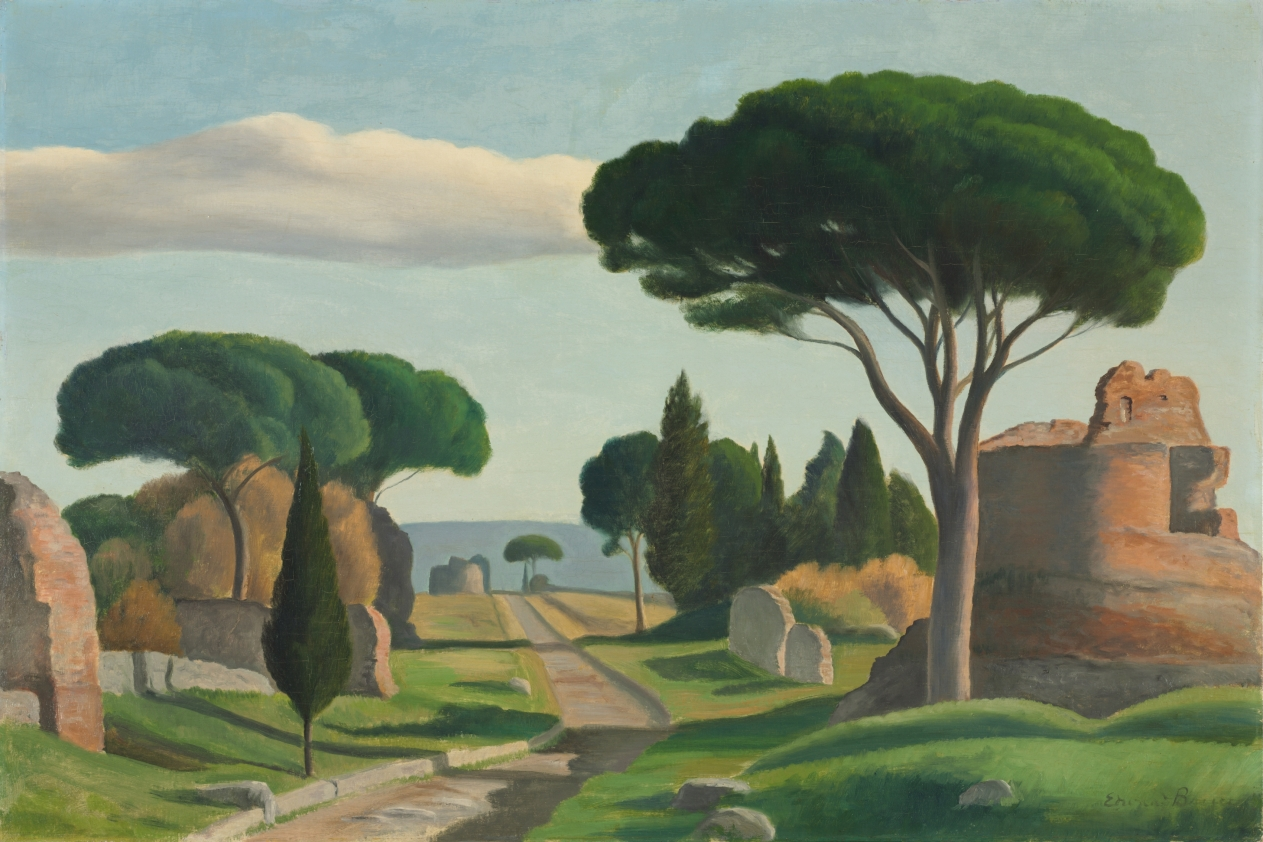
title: The Appian Way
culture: America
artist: Edward Bruce (American, 1879–1943)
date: c. 1929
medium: oil on canvas on panel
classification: Painting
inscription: signed lower right: Edward Bruce